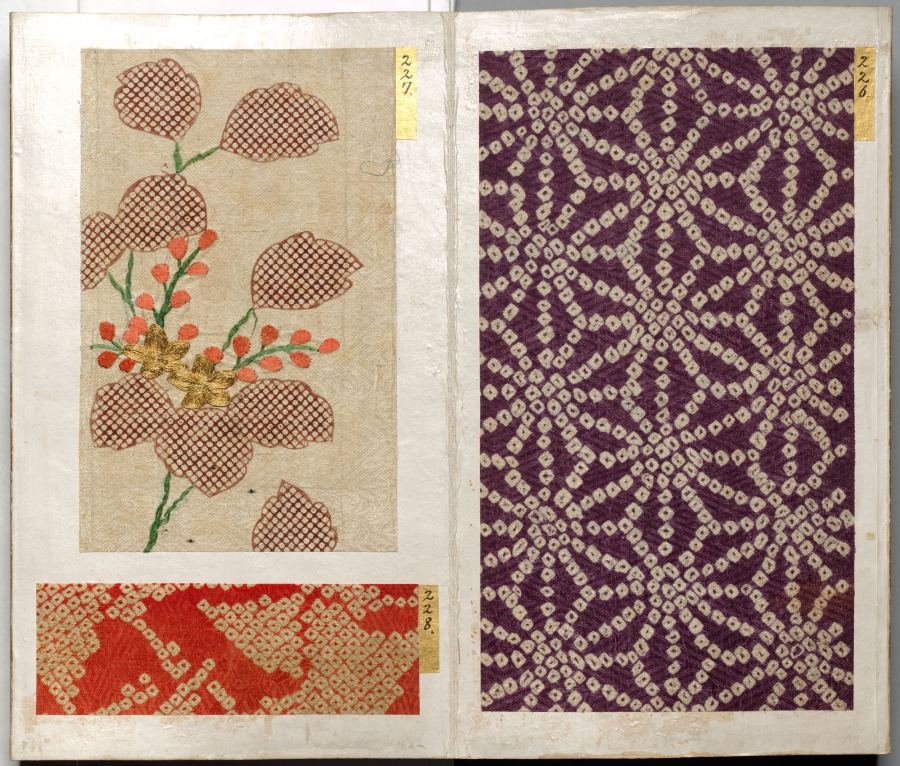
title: Album of Textile Samples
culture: Japan, Edo period (1615–1868)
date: 1600s-1700s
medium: silk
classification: Textile